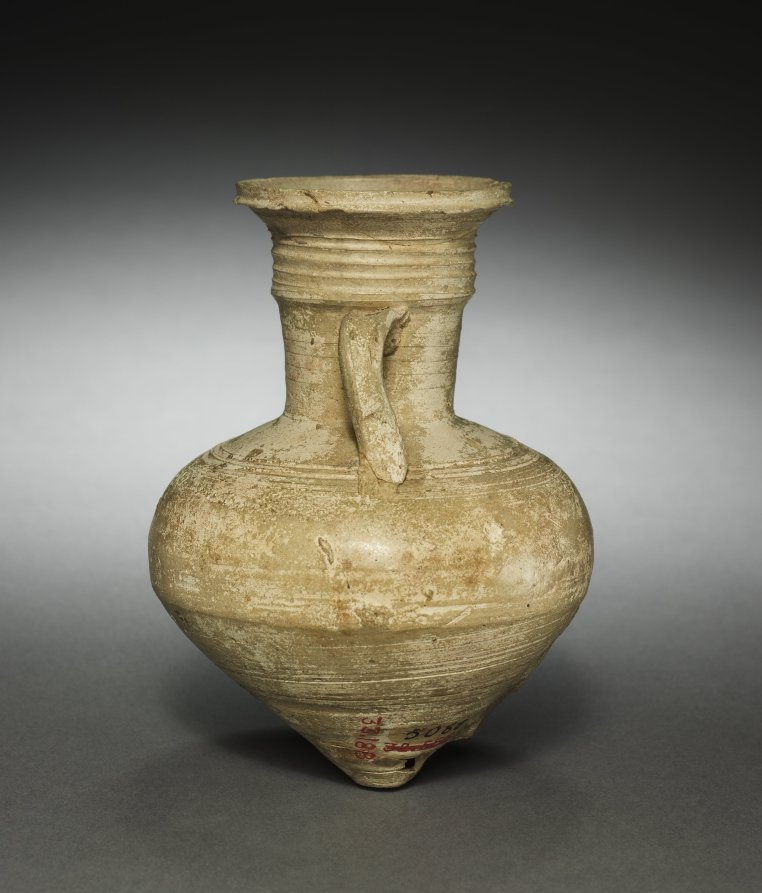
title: Vase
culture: Parthian Empire (247 BCE–224 CE)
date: 1–200 CE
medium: terracotta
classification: Ceramic